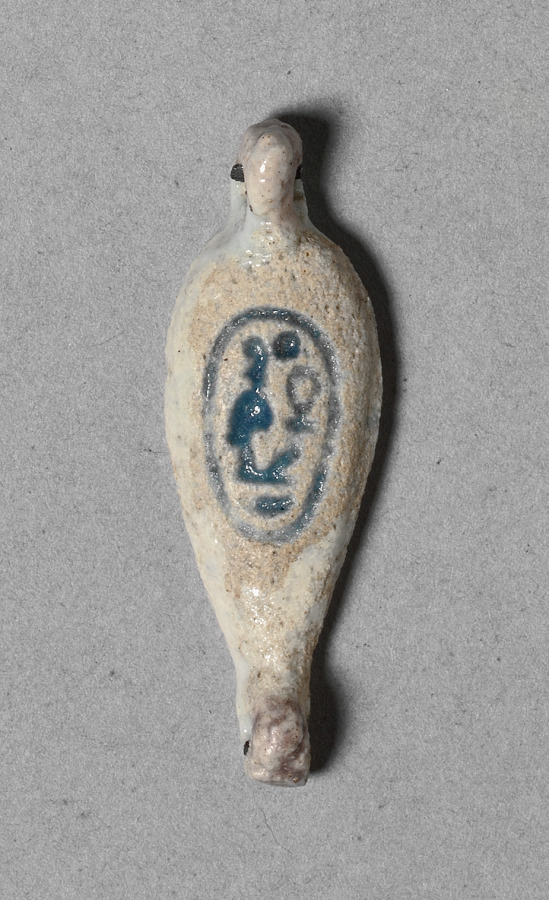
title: Petal-Shaped Bead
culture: Egypt, New Kingdom (1540–1069 BCE), Dynasty 18, reign of Amenhotep III (1390–1352 BCE)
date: c. 1391–1353 BCE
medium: faience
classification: Jewelry